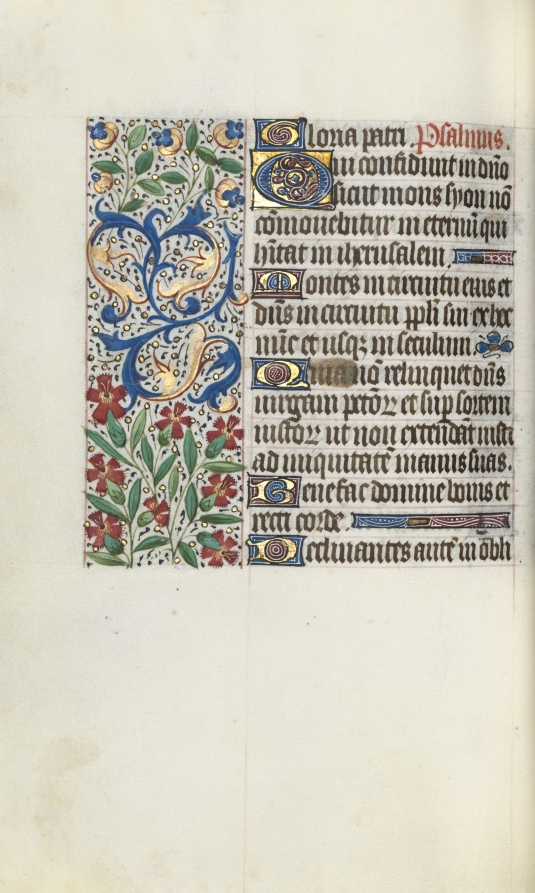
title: Book of Hours (Use of Rouen): fol. 71v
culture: France, Rouen, 15th century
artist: Master of the Geneva Latini (French, active Rouen, 1460–80)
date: c. 1470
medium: ink, tempera, and gold on vellum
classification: Bound Volume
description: In the late 1400s and early 1500s Rouen was an established and important center of book production. The city’s cathedral had a wealthy chapter that spent large sums of money to commission books and to maintain its extensive library. The stationers and booksellers would have likely been concentrated in or near the cathedral precinct. This artist, named after a manuscript now in Geneva, was Rouen’s principal illuminator during the second half of the 1400s.